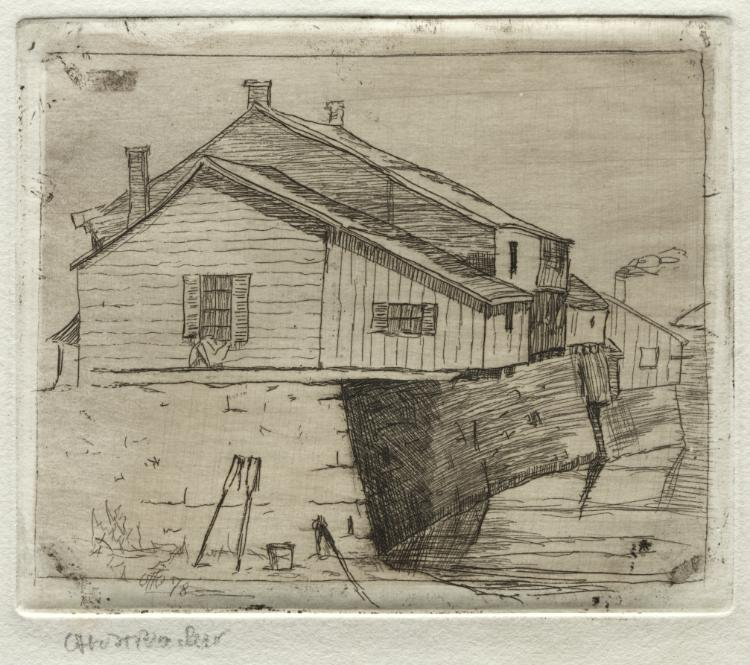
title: Cottages, Cleveland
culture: America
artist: Otto H. Bacher (American, 1856–1909)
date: 1878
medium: etching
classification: Print